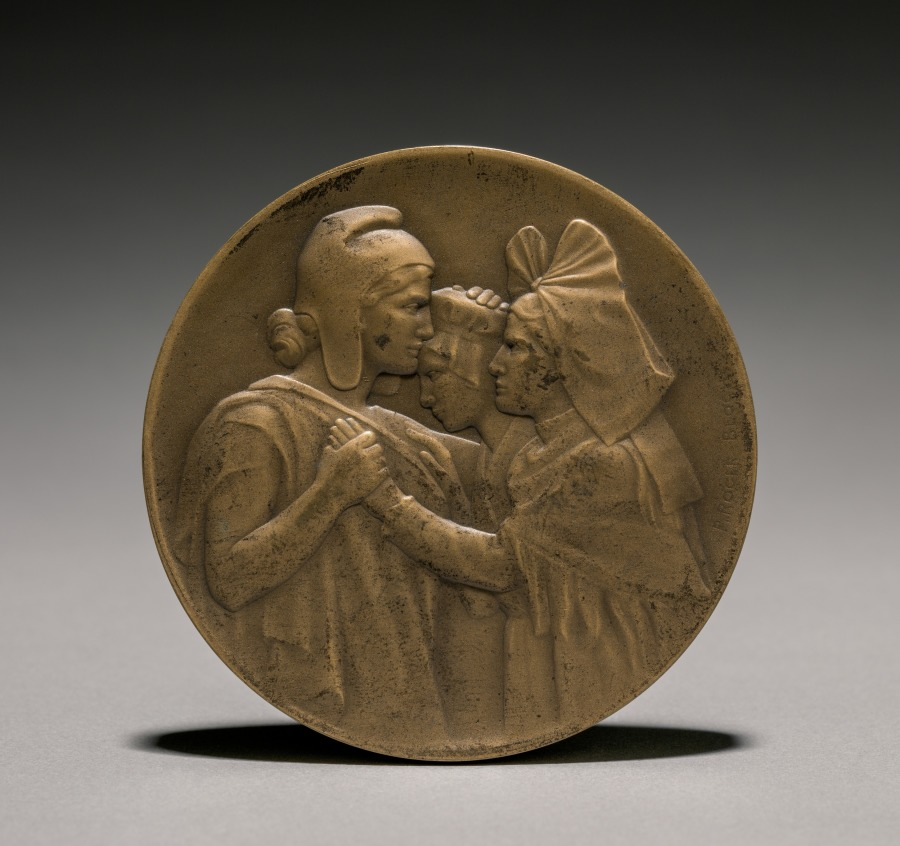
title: Medal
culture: France, 20th century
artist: Paul Roger-Bloche (French)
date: 1900s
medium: bronze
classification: Metalwork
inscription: obverse - "Retour del 'Alsace et de la Lorraine à la France. 11 Novembre 1918."